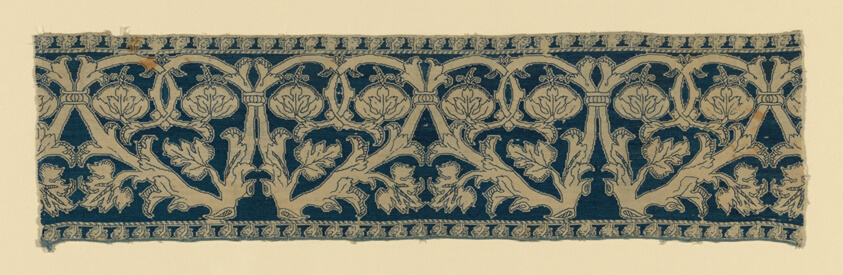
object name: Textile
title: Border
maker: Italy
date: 17th century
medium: Linen, plain weave; embroidered with silk in back and long-armed cross stitches; lower edge finished with silk, twin cord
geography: Italy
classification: textile; needlework (visual works)